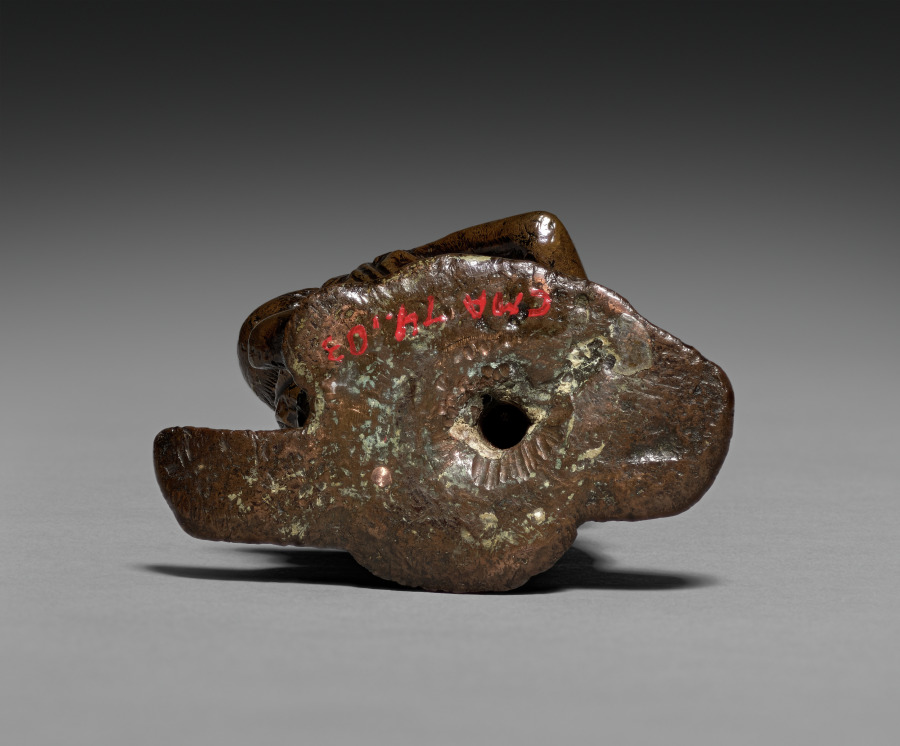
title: Kneeling Saint Jerome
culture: Italy, Ravenna, 16th century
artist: workshop of Severo da Ravenna (Italian, c.1496–c.1543)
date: c, 1525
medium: bronze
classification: Sculpture